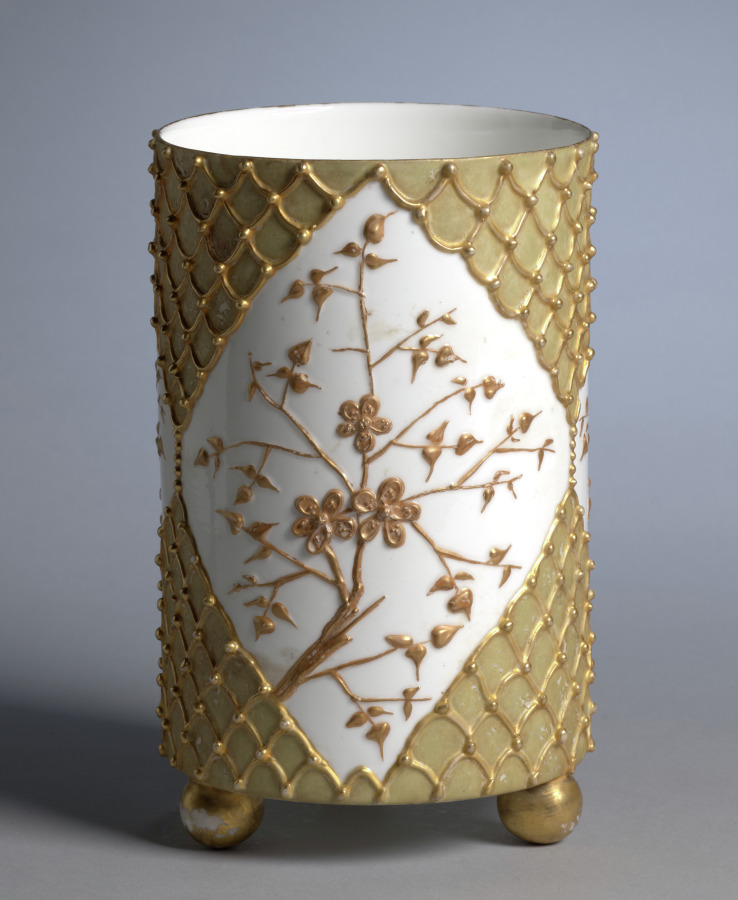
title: Vase (Lotus Ware)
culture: America, Ohio, East Liverpool, 19th century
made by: Knowles, Taylor and Knowles Company (American)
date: c. 1895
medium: porcelain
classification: Ceramic